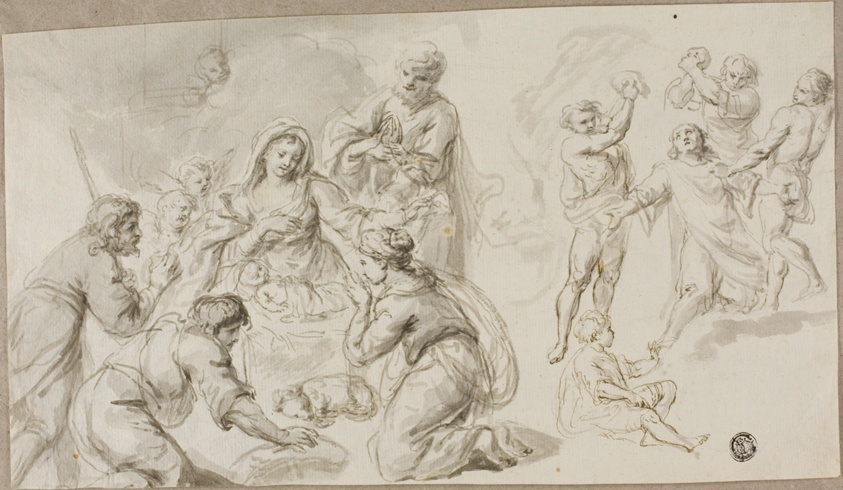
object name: Drawing and Watercolor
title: Adoration of the Shepherds; Stoning of Saint Stephen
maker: Unknown Artist; Italian, 1600-1699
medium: Pen and brown ink and brush and gray wash, on ivory laid paper, tipped onto gray wove paper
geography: Italy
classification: ink or chalk wash; drawings (visual works); prints and drawing